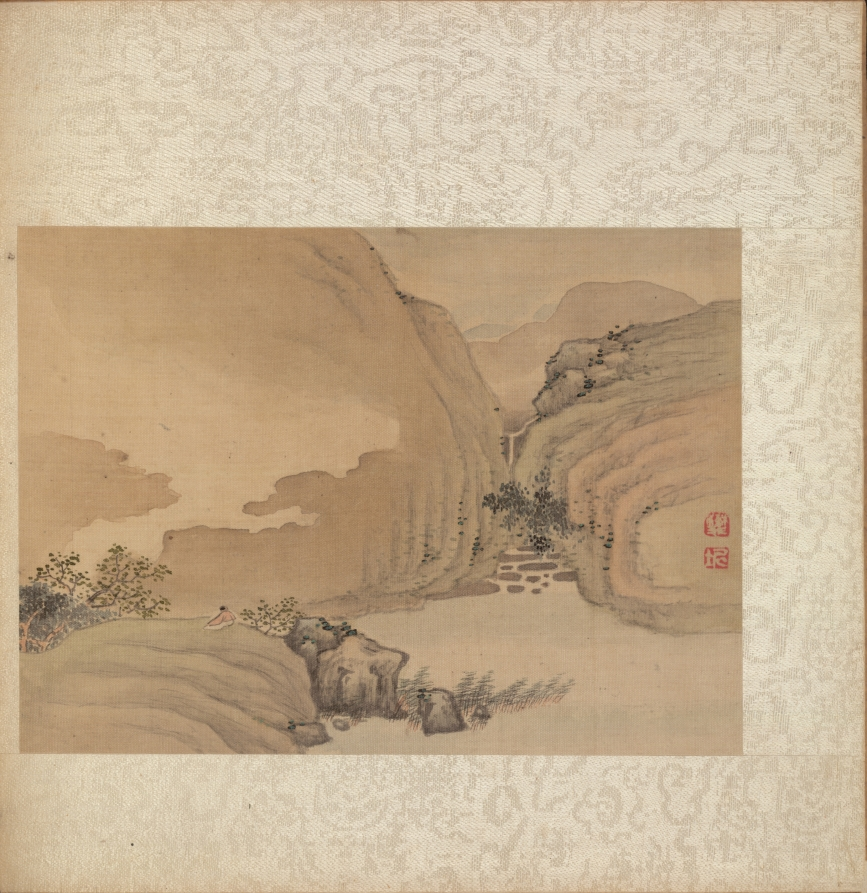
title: Album of Miscellaneous Subjects, Leaf 3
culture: China, Qing dynasty (1644-1911)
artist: Fan Qi (Chinese, 1616–after 1694)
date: early 1650s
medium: album leaf, ink and color on silk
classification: Painting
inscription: Artist seal: Fan Qi 樊圻. Poem by Xu Fang 徐枋 (1622–1694): Green are the reeds, the sun not yet set;/ Tree foliage and mountain colors divide the lake in two halves./ A solitary recluse sits upon a flat bluff,/ Occasionally observing white clouds rising from the mountain tops.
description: Fan Qi's painting for the third leaf of the album evokes Wang Wei's poetic line: Sit and watch the clouds rising. Xu Fang's calligraphic colophon reads: Green are the reeds, the sun not yet set; Tree foliage and mountain colors divide the lake into two halves. A solitary recluse sits upon a flat bluff, Occasionally observing white clouds rising from the mountain tops.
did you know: A waterfall descends between two mountains; the series of cascades is hinted by the careful placement of intermittent rocks.